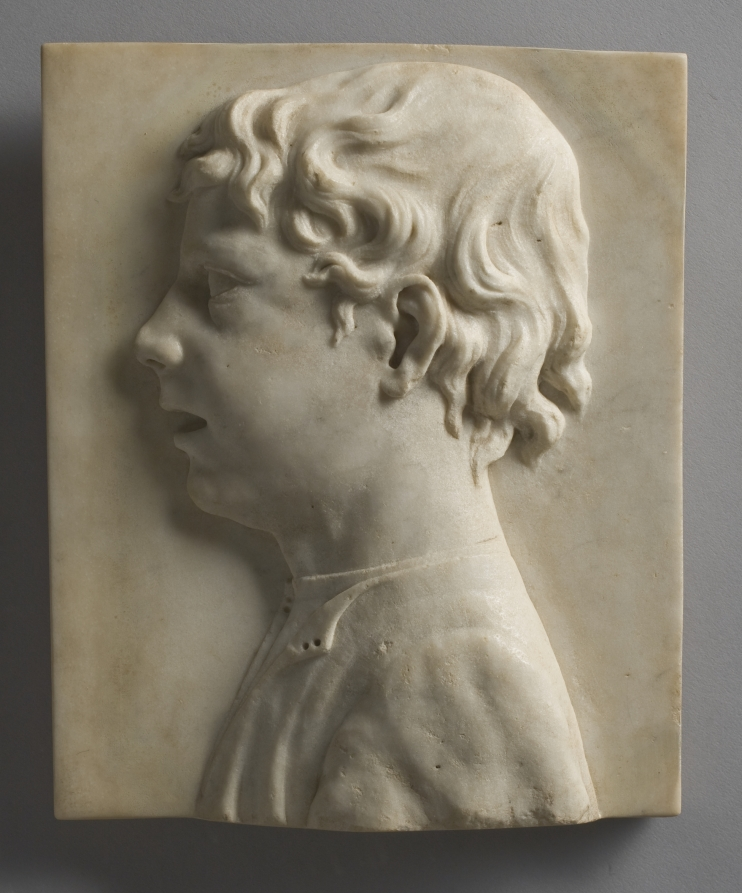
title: Head of a Boy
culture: Italy, Florence, 15th century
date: c. 1460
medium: marble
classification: Sculpture